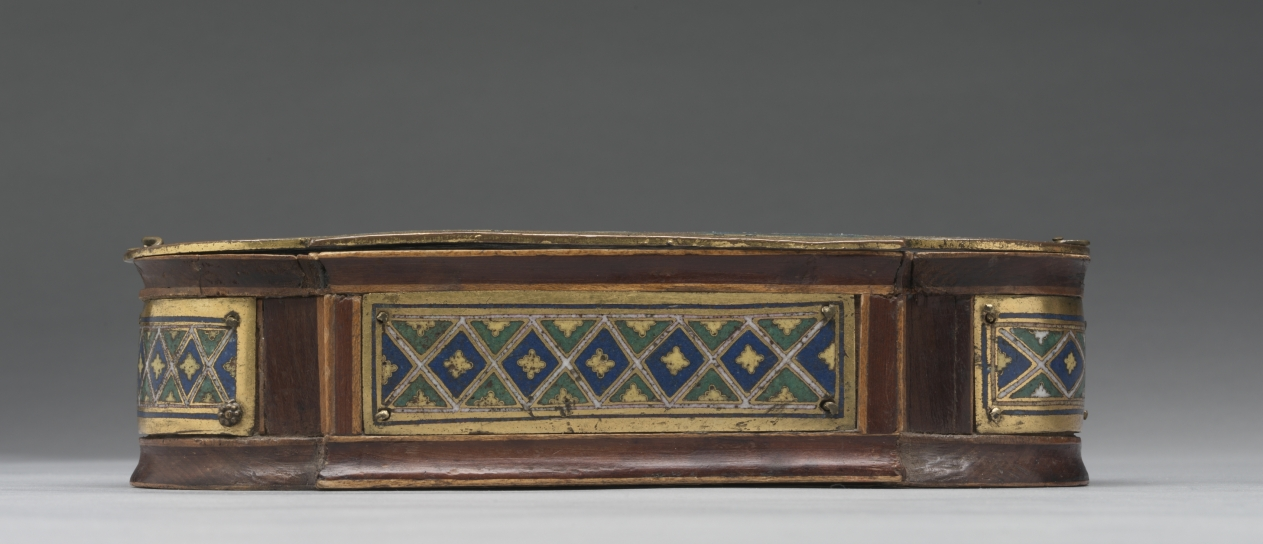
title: Pyx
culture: Germany, Lower Saxony, Hildesheim?, Romanesque period, enamels: 12th century; wood core: 19th century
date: c. 1170–1180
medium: gilded copper, champlevé and cloisonné enamel, wood core (modern)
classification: Enamel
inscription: + H[A]EC DATA P[ER] IVSTV[M] […]AT IN CRVCE VICTIMA CHR[ISTV]M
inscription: + HOC ARIES P(RE)FERT Q[VO]D […] D[EV]S HOSTIA P[ER]FERT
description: The image of Christ’s crucifixion dominates this enameled box. Personifications of the Christian church, the Jewish faith, and the Virgin and Saint John flank the cross. Two Old Testament scenes--Abel’s sacrifice of sheep and Abraham’s sacrifice of Isaac--appear on either side. The box once served as a pyx, a container for the consecrated host, itself a symbol of Christ’s sacrifice.